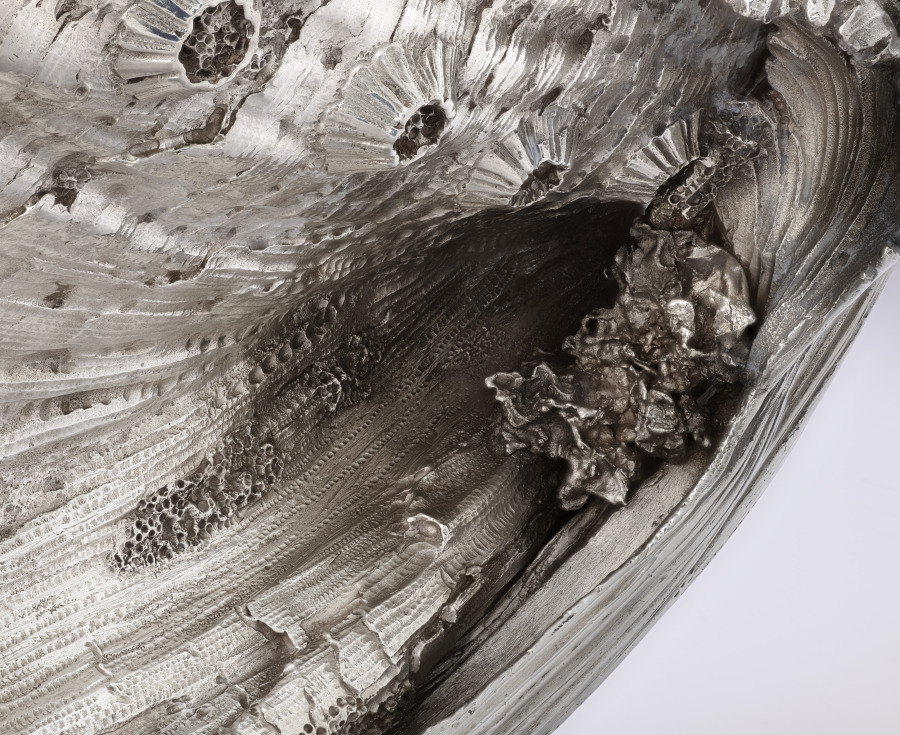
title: Tureen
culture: France, Paris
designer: Juste-Aurèle Meissonnier (French, 1695–1750)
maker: Pierre-François Bonnestrenne (French)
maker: Henry Adnet (French, 1745)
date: 1735–38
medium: silver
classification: Silver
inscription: engraved Meissonnier signature.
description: See entry for cover record 1977.182.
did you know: The langoustine, pigeon, and vegetables were cast using real examples giving the silver copies lifelike detail and appearance.